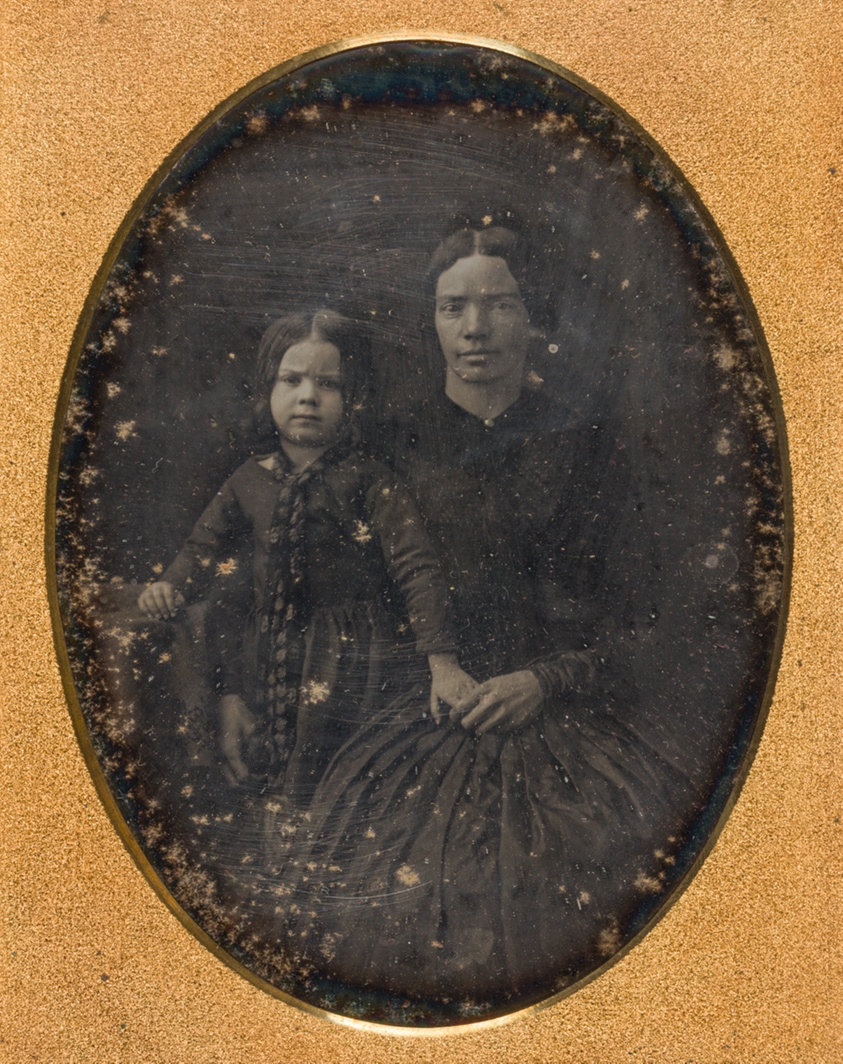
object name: Photograph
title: Untitled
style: 19th century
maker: Fontayne & Porter; American, active 1848–1856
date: 1848/56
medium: Daguerreotype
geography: United States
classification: daguerreotype; photographic process; photography; photograph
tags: portraits, portraits: female subject, photography, portraits: multiple subjects, formal portraits, portraits: child subject